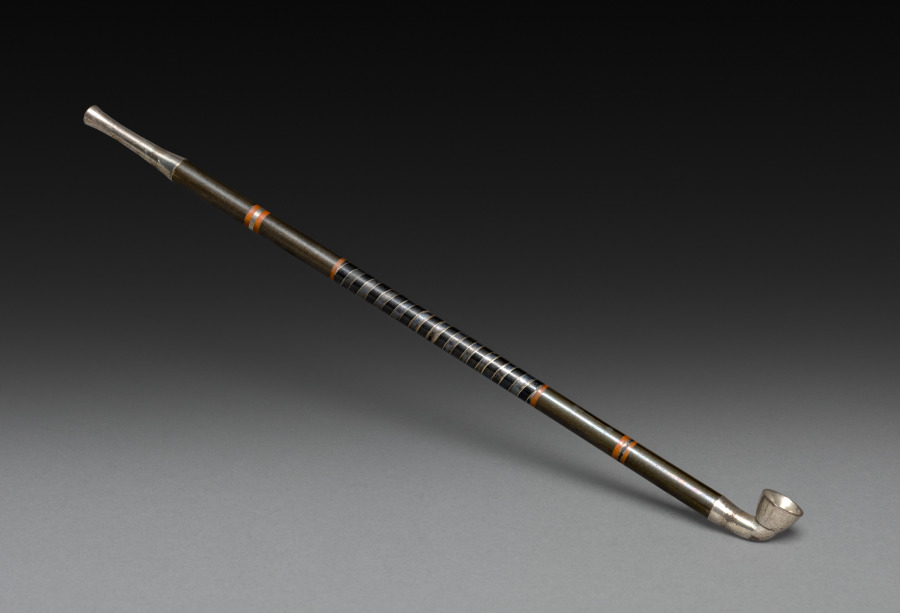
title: Tobacco Pipe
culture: Japan, Edo period (1615–1868)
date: 1700s to mid-1800s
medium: metals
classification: Miscellaneous